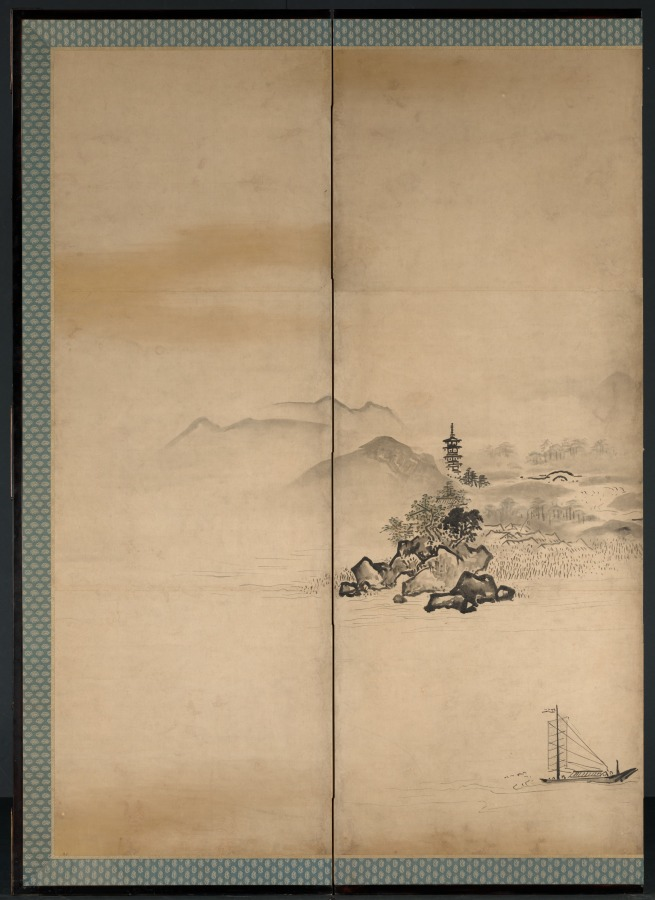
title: The Four Seasons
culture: Japan, Edo period (1615–1868)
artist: Kano Tan’yū (Japanese, 1602–1674)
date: 1668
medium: Six-panel folding screen, ink and slight color on paper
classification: Painting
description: Tan'yū's skills were honed early within the regimen of the Kano family's painting studio. His grandfather, Eitoku (1543–1590) was the Momoyama period's most sought-after painter, a champion of colorful, large-scale painting compositions who worked for several of the country's most powerful leaders. When the young Tan'yū was summoned to Edo in 1617 by the shogun to become a member of the new capital's official painting studio, few opportunities to work on similarly ambitious projects existed. Yet by the end of his career, Tan'yū had supervised the execution and installation of linked mural painting compositions in several of Japan's most prestigious residences and castles. As an official court painter to the first shogun, Tokugawa Ieyasu (reigned 1603–5), and then his successors, Tan'yū appears to have successfully juggled his official duties with private activities as a teacher, as the era's leading connoisseur of classic Chinese and Japanese painting, and as a practicing artist. His surviving compositions as well as thousands of sketches far surpass the oeuvre of any of his contemporaries. While studio assistants surely contributed to his oeuvre, just as later imitators consciously confused his accomplishments, a clearer image of the painter has emerged in recent years that better conforms with his contemporary acclaim as recorded in seventeenth- and eighteenth-century documents. Tan'yū can now be seen as an artist adept in virtually all traditional ink painting subject matter, which he often presented in novel interpretations. Equally important are his rare screen (byōbu) compositions executed in a pure yamato-e manner with vivid mineral pigments on a gold-foil background. This pair of byōbu presents Tan'yū's more orthodox approach to academic ink painting methods embracing Chinese themes that had been interpreted by numerous Japanese ink painters over the centuries. Thus a typical view of residences and human activities set along the shores of an impressive river (or lake) is enlivened by the Japanese proclivity for including seasonal references. Proceeding from right to left, the viewer passes sequentially from spring to the snow-laden branches of winter. Tan'yū lends considerable atmospherics to the panorama in his use of misty cloud banks, frequently set off by sharp, darkened ink lines or whole areas of ink washes of variegated tonalities. The spring and summer views are particularly notable in this regard, as is the presence of the artist's signature on both byōbu, attesting to their completion in Tan'yū's sixty-seventh year (1668)—50 years after he left Kyoto for the capital, and 30 years following his adoption of the artist name "Tan'yū" (in 1635). From 1622, when he began work on the mural paintings for Edo castle (the shogun's formal residence), through the completion of the painting cycle in 1636 for the Tokugawa family mausoleum in Nikkō to the north of Edo, Tan'yū's skills as head of an accomplished painting studio as well as a master painter found their most impressive expression in large-scale compositions. In 1638 he received the honorary Buddhist title Hōgen (Eye of the Law). It is intriguing therefore that relatively few independent byōbu paintings from the master's hand survive, particularly documented early works.